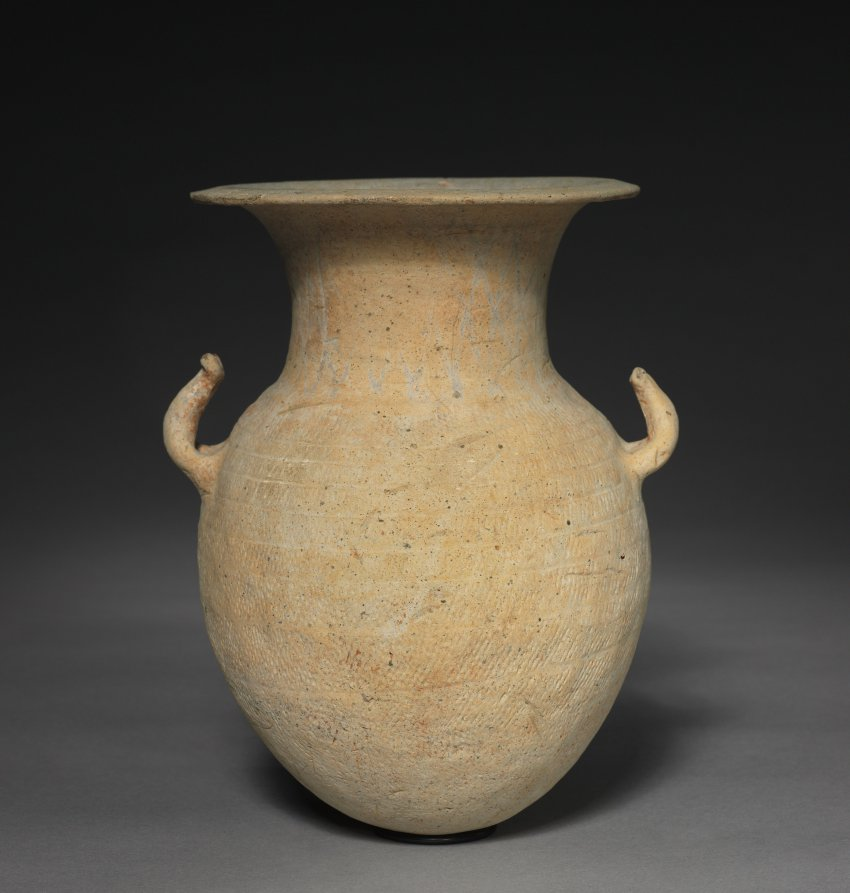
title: Jar with Horn-Shaped Handles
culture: Korea, Silla (57 BCE–935 CE)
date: 200s–400s CE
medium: earthenware with incised decoration and color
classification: Ceramic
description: Pottery vessels, such as this one, were produced in sloping tunnel kilns that reached 1,000 to 1,200 degrees Celsius. This jar’s bulbous body with delicate horn-shaped handles suggests that it may have served to present offerings to the deceased. This type of high-fired terracotta vessel is usually excavated from tomb sites in the southwestern region of the Korean peninsula.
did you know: Closed kilns built on hillsides became widely used for producing this type of pottery vessel in Korea during the Three Kingdoms period.